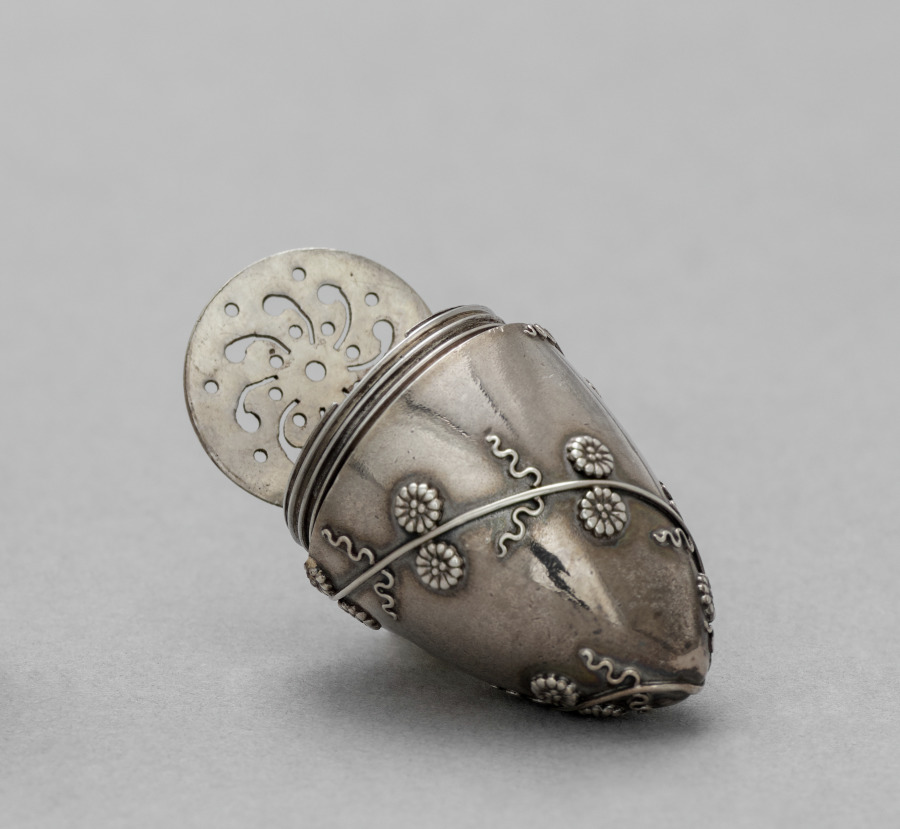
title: Container for Smelling Salts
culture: America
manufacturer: Tiffany & Co. (America, New York, est. 1837)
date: c. 1860–70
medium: silver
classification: Silver